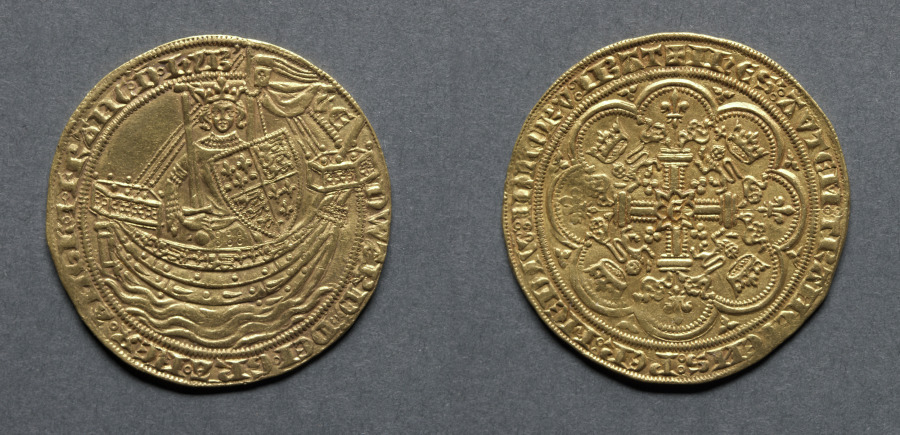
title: Noble: Edward III Standing in Ship with Shield of Arms (obverse); Ornamental Cross with Lis Terminals (reverse)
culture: England, Edward III, 1327-1377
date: 1351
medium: gold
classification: Coins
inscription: EDWARD DEI GRA REX ANGLE Z FRANC D HYB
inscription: IHES AVTEM TRANSIENS PER MEDIV. ILLORV IBAT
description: Bearing in mind the primitive tools and methods of production in the 1300s, this noble, and other similar pieces are remarkable for their beauty and fineness of detail. In all the indentures of this period a clause was inserted providing for the trial of the Pyx. The Master of the Mint was supposed to place in the Pyx, a small box, a sample of all coins struck. These were left for three months and then tested by a committee to verify the weight and fineness. For many centuries the Trial of the Pyx took place in the Pyx Chamber at Westminster Abbey which visitors may still see today. In the 1800s the trial was transferred to Goldsmiths Hall where it is still held annually. Each three months some initial or secret mark was put on the coin to show that another three month period had started. These marks consisted of initial marks plus combinations of single or double annulets, broken annulet, unbarred N's, reversed S's, and so forth.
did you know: The noble was the first English gold coin produced in larger numbers and was introduced by King Edward III.